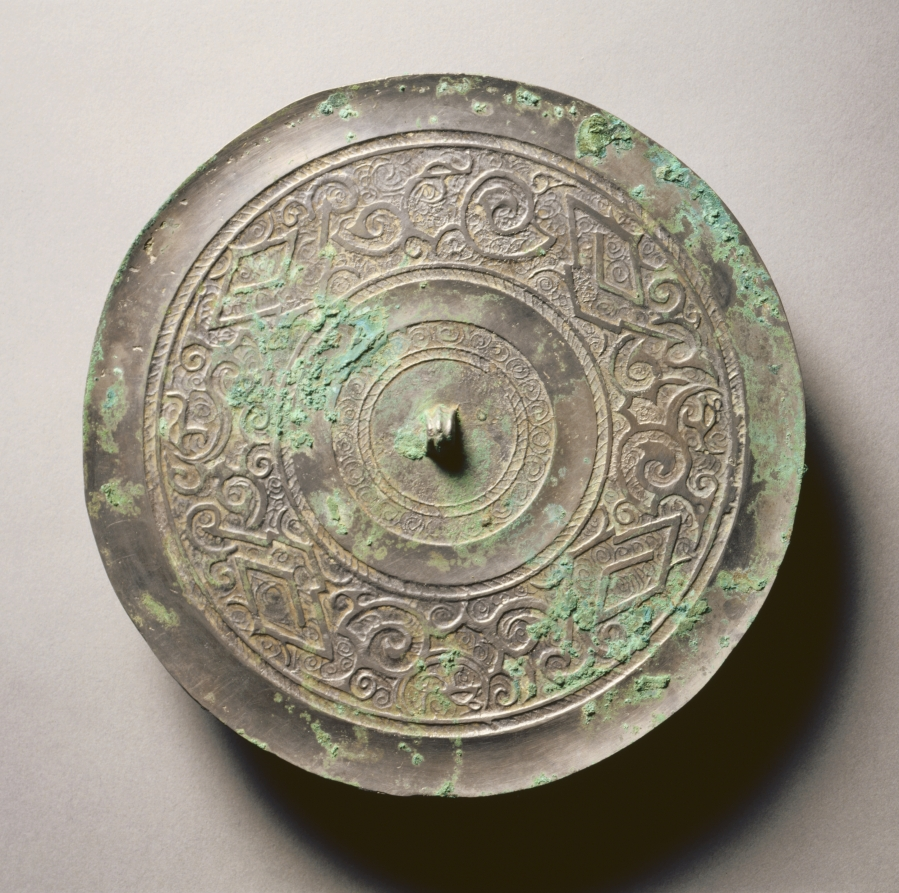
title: Mirror with Serpentine Interlaces and Angular Meanders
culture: China, Eastern Zhou dynasty (770–256 BCE), Warring States period (475–221 BCE)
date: early 500s–late 300s BCE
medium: bronze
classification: Metalwork